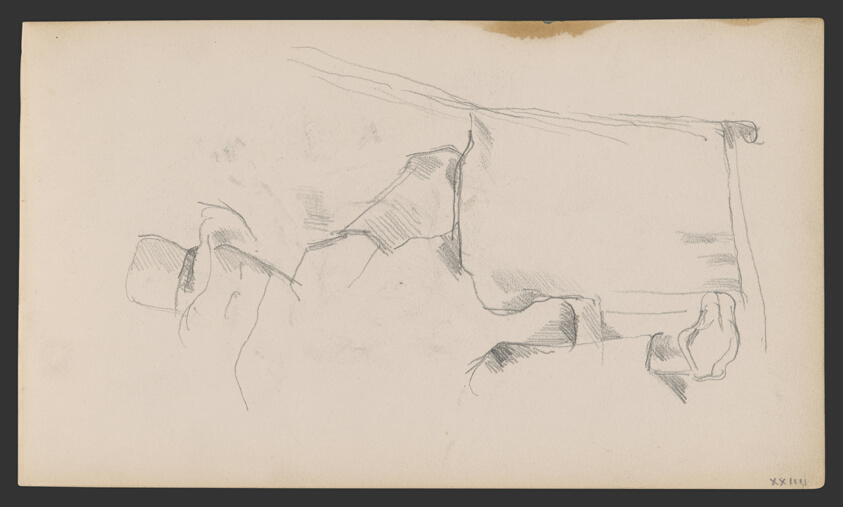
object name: Drawing and Watercolor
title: Sketchbook No. 2 (L'Estaque)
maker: Paul Cézanne; French, 1839-1906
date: 1875–86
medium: Graphite and pen and ink drawings on paper, bound into a book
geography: France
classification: sketchbook; graphite; prints and drawing; paper